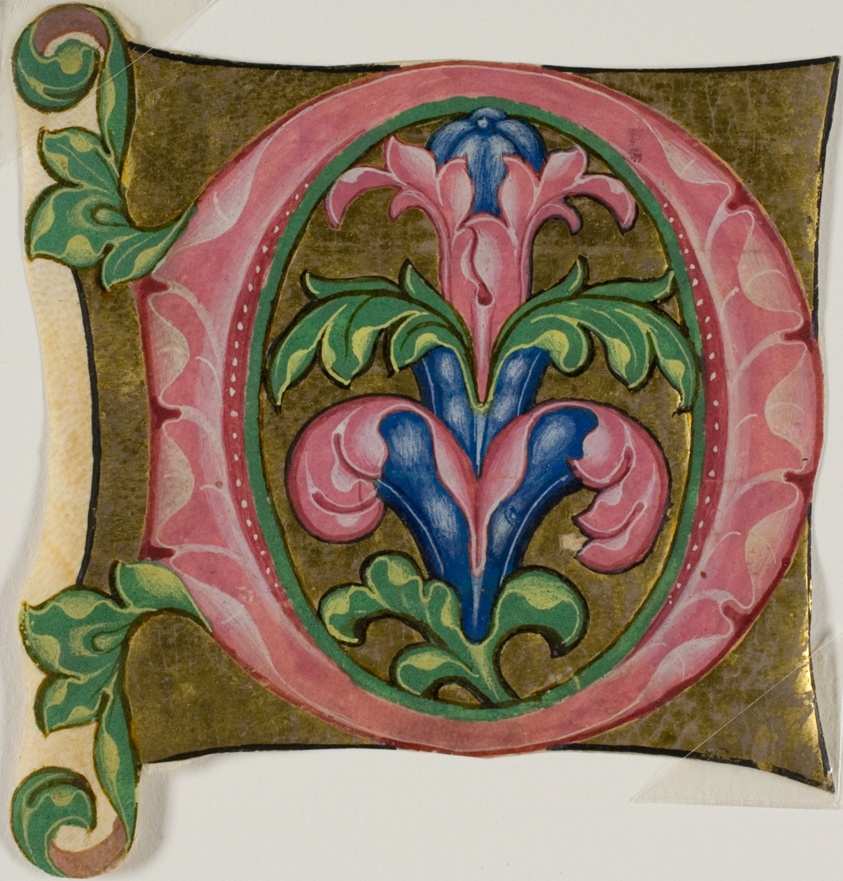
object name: Drawing and Watercolor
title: Decorated Initial "D" with Acanthus Leaves from a Choir Book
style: medieval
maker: European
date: 14th century or modern, c. 1920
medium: Manuscript cutting in tempera and gold leaf on vellum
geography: Europe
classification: tempera; manuscript; drawings (visual works); prints and drawing